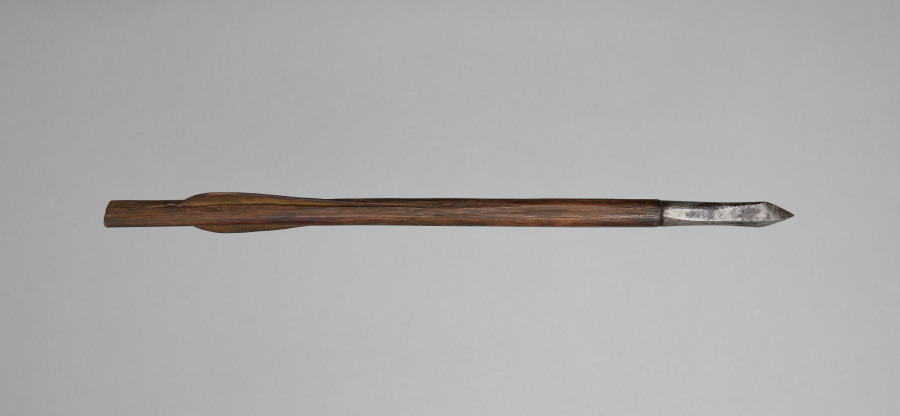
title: Crossbow Bolt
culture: Germany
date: 1500s-1600s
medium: wood, leather, steel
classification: Arms and Armor